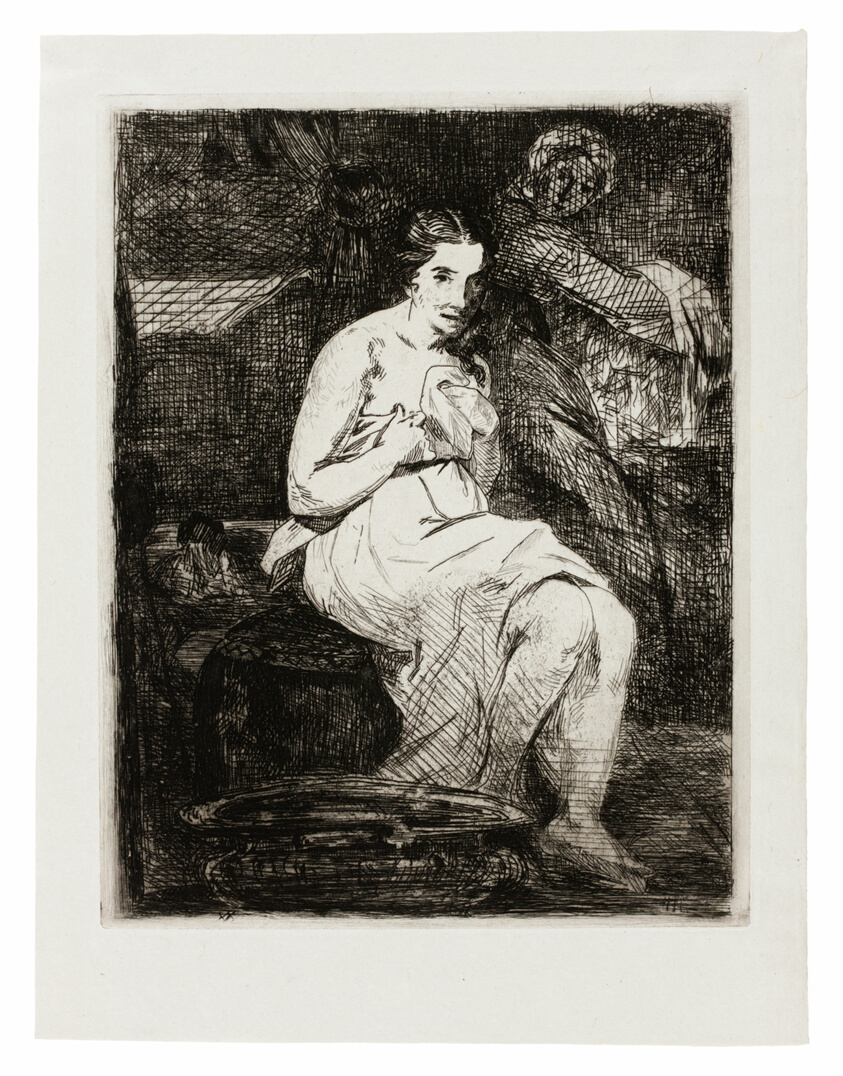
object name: Print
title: The Toilette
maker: Édouard Manet (French, 1832-1883)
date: 1862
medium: Etching in black on ivory laid Chinese paper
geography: France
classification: etching; print; prints and drawing